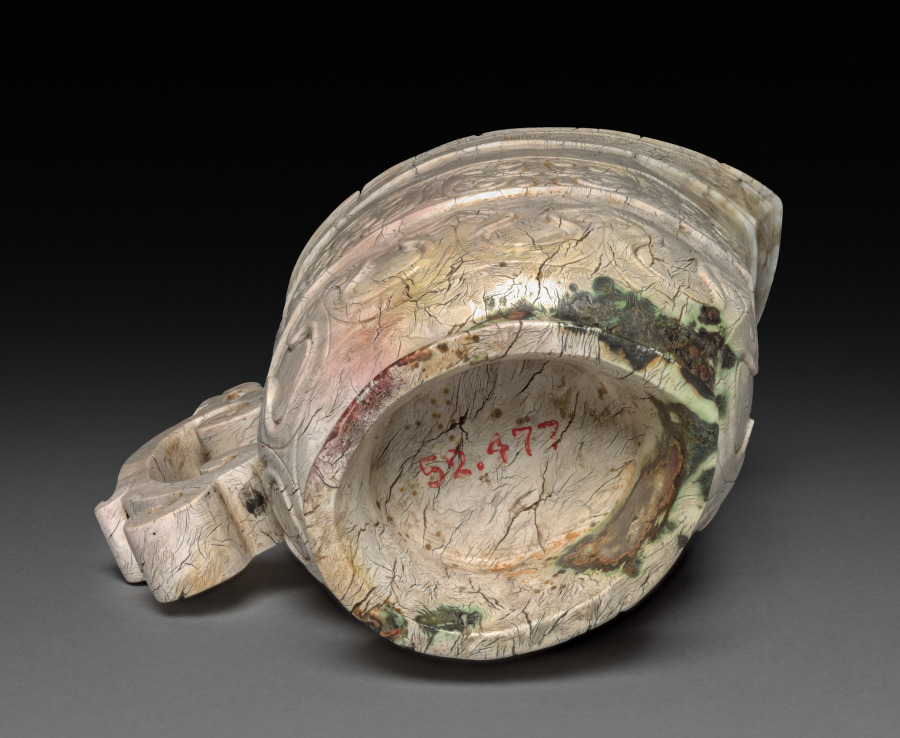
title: Ewer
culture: China, Ming dynasty (1368–1644)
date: 1700s or later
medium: jade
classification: Jade